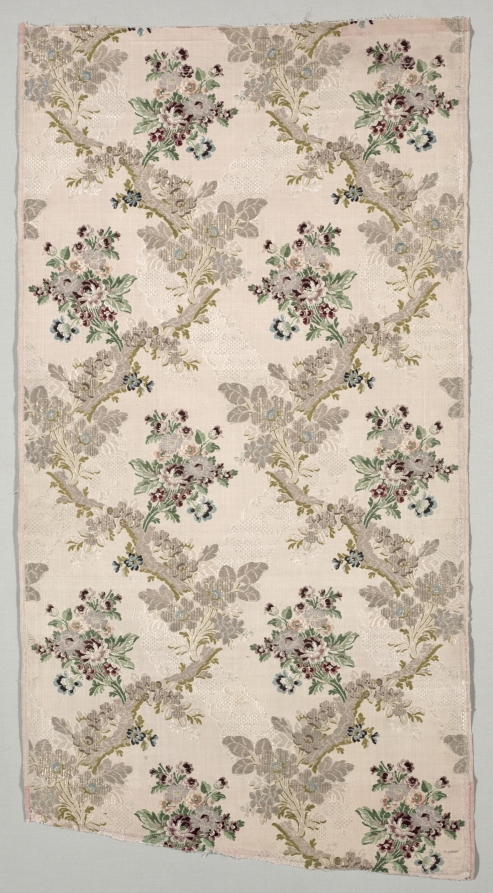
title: Length of Silk Brocade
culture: France, Lyon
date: 1723–1774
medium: brocade; silk and metal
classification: Textile